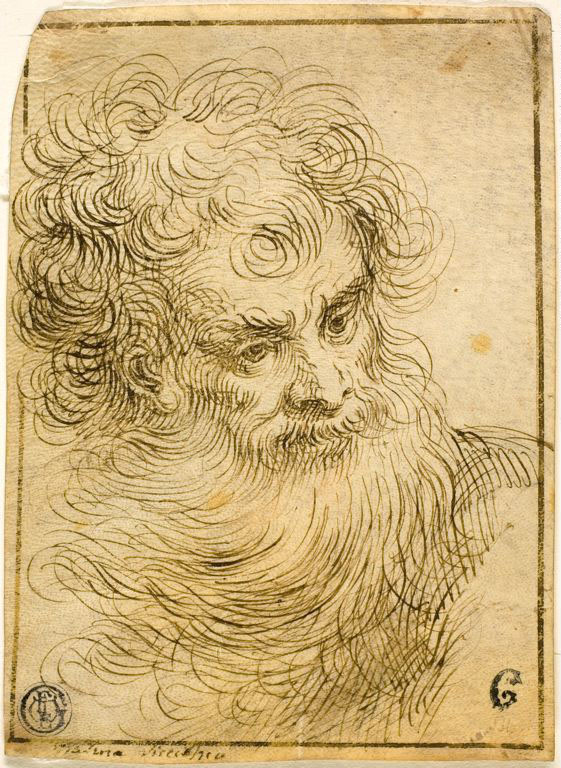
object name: Drawing and Watercolor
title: Head of Bearded Old Man (recto); Decorative Sketch of Flower and Leaves (verso)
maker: After Jacopo Negretti, called Palma il Giovane; Italian, c. 1548-1628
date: 17th/18th century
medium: Pen and brown ink (recto and verso) on vellum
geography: Italy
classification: ink with wash; drawings (visual works); prints and drawing